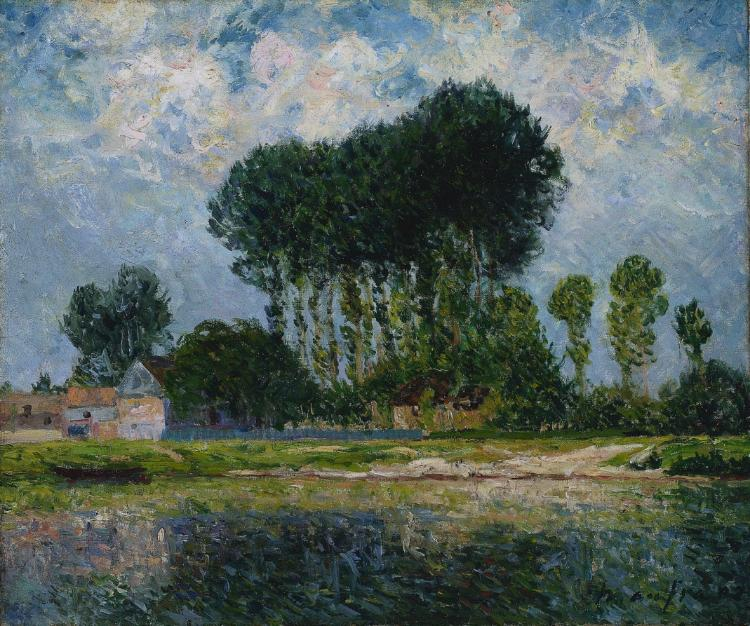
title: The River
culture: France, 19th century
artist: Maxime Maufra (French, 1861–1918)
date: 1902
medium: oil on fabric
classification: Painting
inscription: Signed lower right: Maufra 02